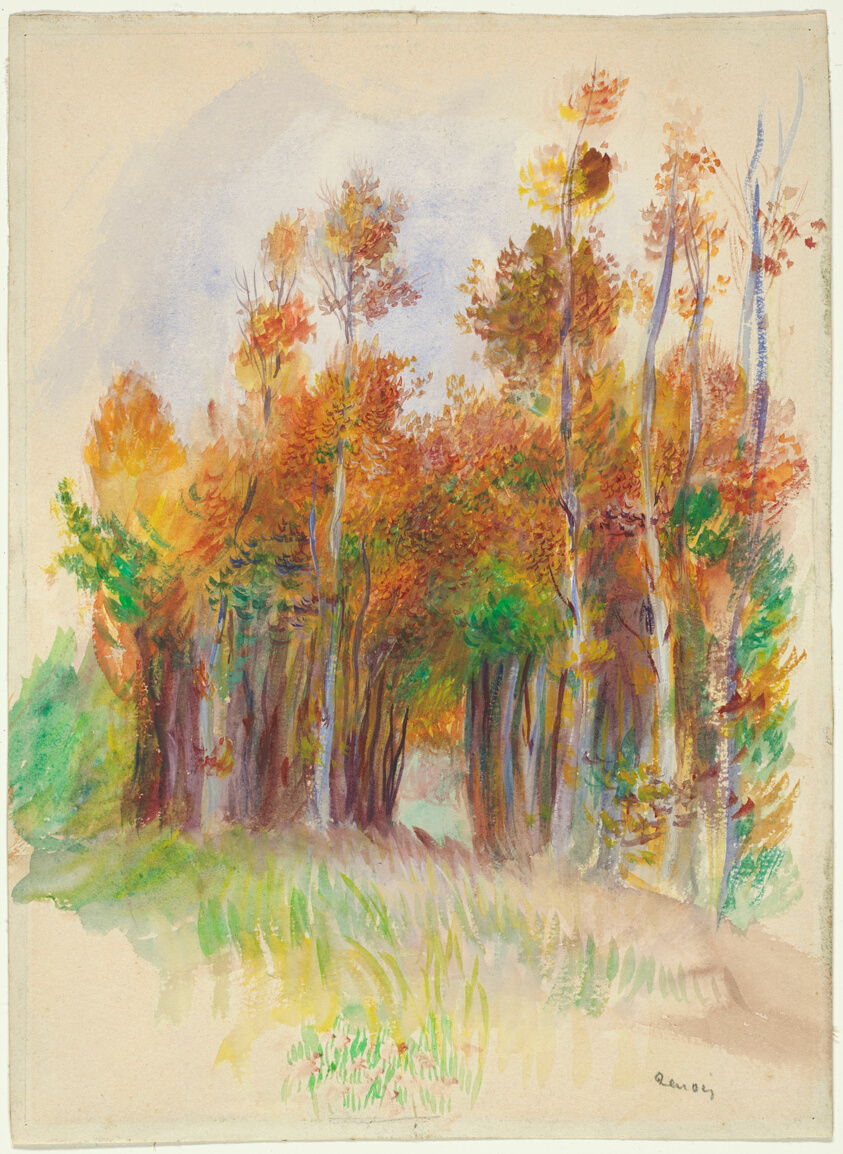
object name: Drawing and Watercolor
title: Grove of Trees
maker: Pierre Auguste Renoir; French, 1841-1919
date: 1888/90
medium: Opaque and transparent watercolor on cream wove paper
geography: France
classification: watercolor; drawings (visual works); prints and drawing